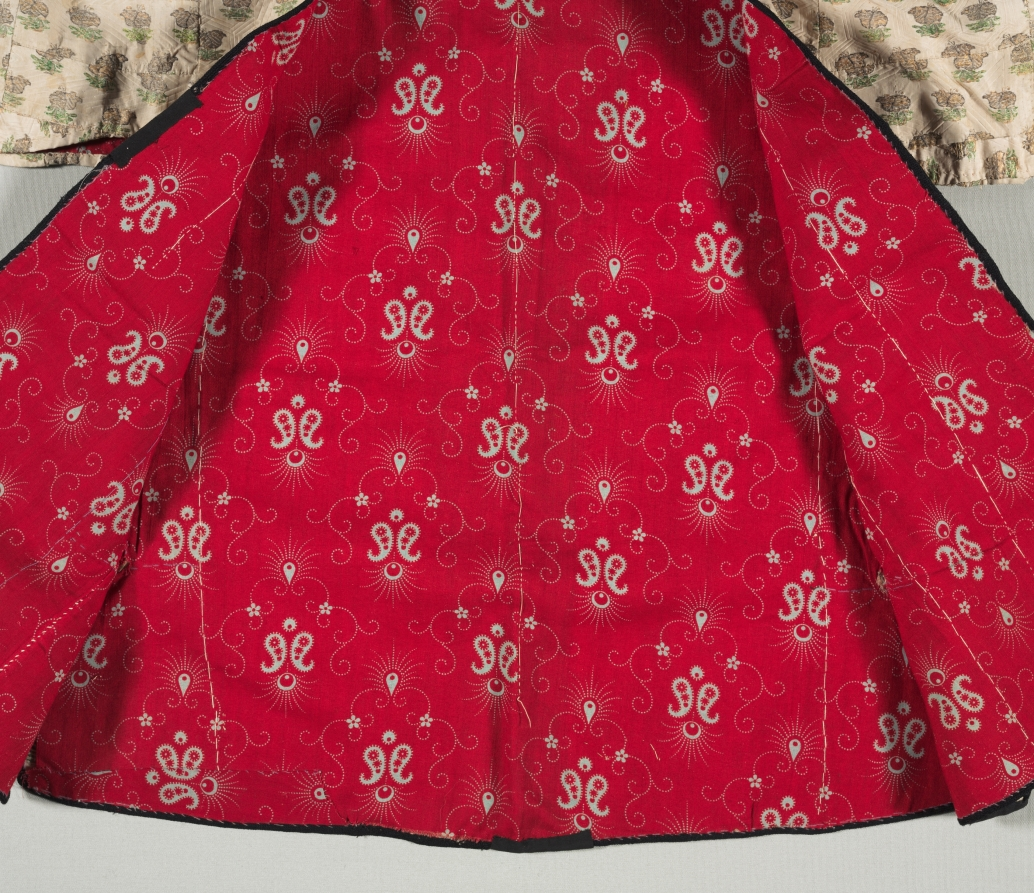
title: Jacket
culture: Iran, 18th century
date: 1700s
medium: Silk taffeta, brocaded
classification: Garment